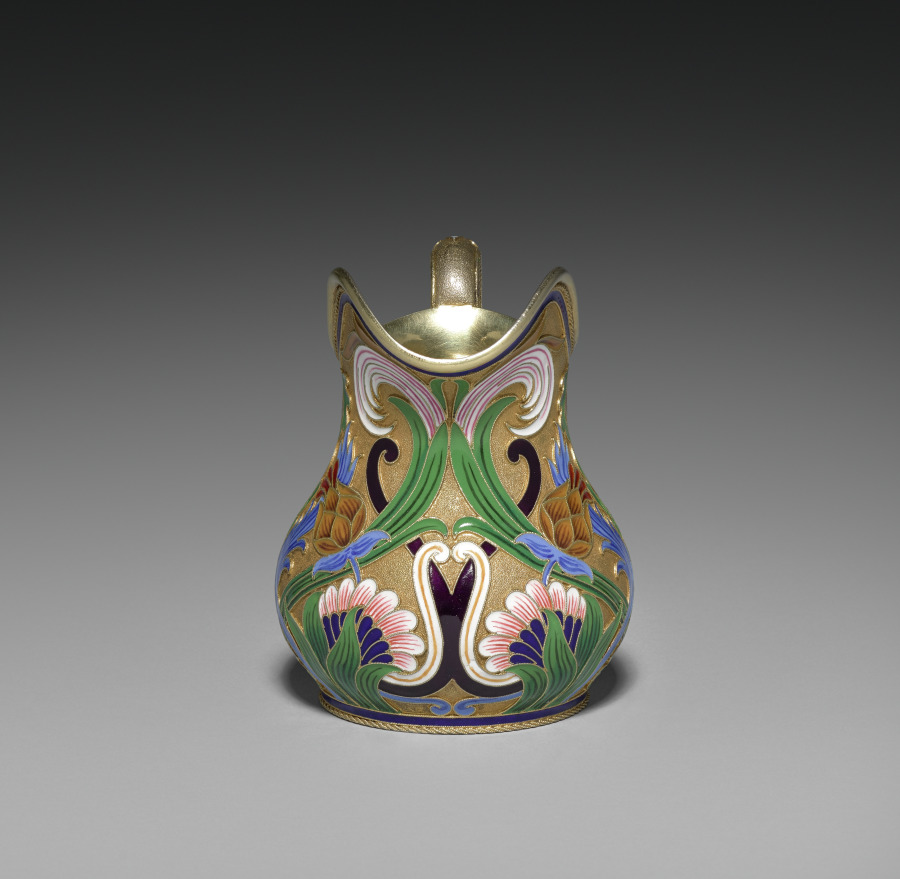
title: Creamer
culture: Russia, St. Petersburg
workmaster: attributed to Feodor Ivanovich Rückert (Russian, 1840–1917)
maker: House of Fabergé (Russian, 1842–1918)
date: 1887–96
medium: silver gilt, opaque cloisonné enamel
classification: Miscellaneous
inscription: 88, St. George [assay mark for Moscow, 1882-1896]; C. Fabergé (in Cyrillic); double-headed eagle [imperial warrant]; 10593 scratched.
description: Fabergé’s craftsmen in Moscow, especially under the watchful eye of workmaster Feodor Rückert, became known for their work in the Pan-Slavic or Neo-Russian style, hearkening back to 17th-century motifs of Russian folk art. Often on rather conventional shapes, Rückert and his silversmiths created an explosion of color, achieved through the historic technique of cloisonné enamel in which tiny metal lines are soldered to the surface then filled with glass powders in various colors and fired to create a high gloss finish. The result is a spectacular evocation of the 17th-century originals. Far from mere copies, however, Rückert's designs, such as this tea service, employ naturalistic or abstract motifs in a thoroughly modern adaptation of a remarkable earlier period of Russian art and decoration.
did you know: This creamer is part of a larger tea service.